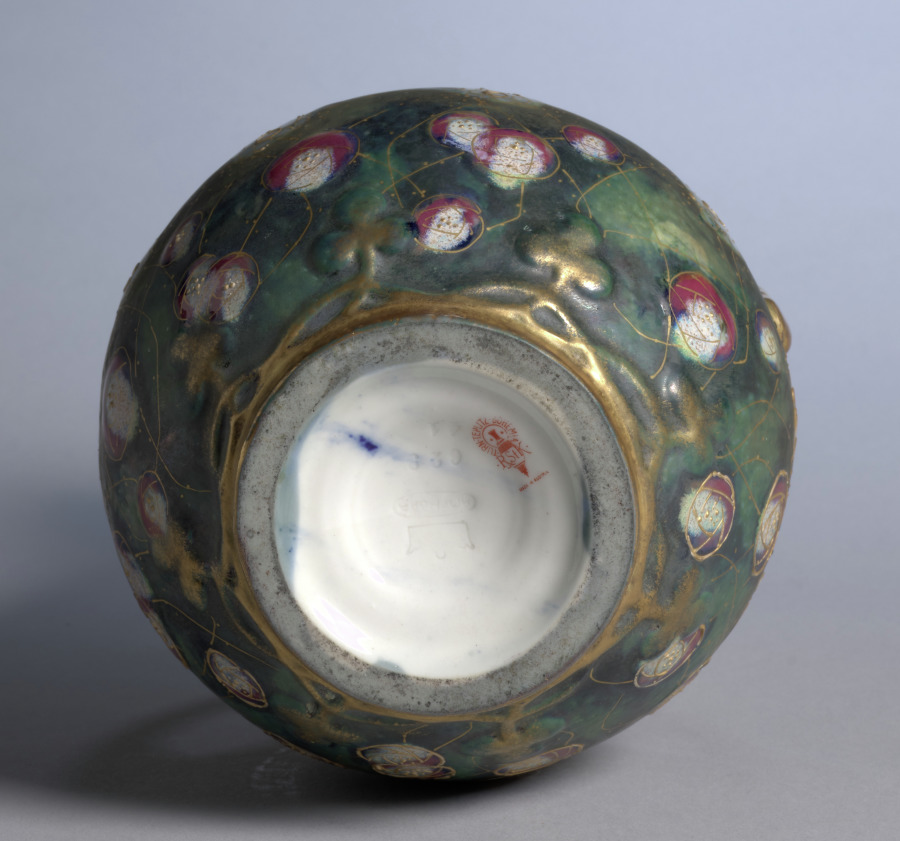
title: Vase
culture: Czech Republic, Turn-Teplitz, early 20th Century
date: c. 1900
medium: porcelain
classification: Ceramic